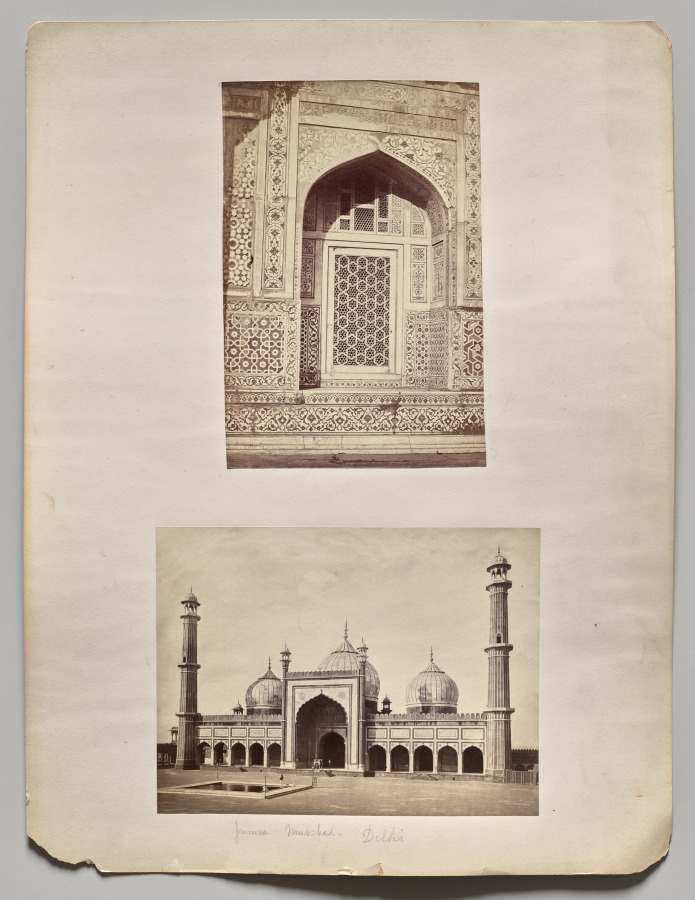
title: Untitled (Jama Masjid, Delhi)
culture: England, 19th century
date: 1870s (?)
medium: 2 albumen prints mounted on an album page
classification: Photograph